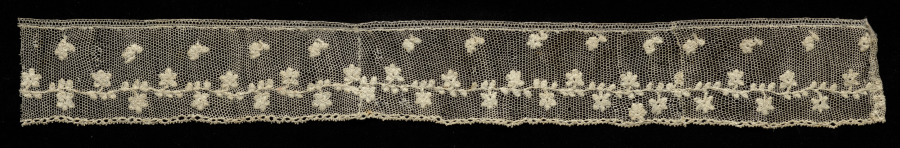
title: Lace Edging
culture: Italy, Burano(?), 1700s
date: 1700s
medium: Silk: needle lace (Burano Point)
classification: Lace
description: This lace fragment has a design common during the reign of Louis 16th.